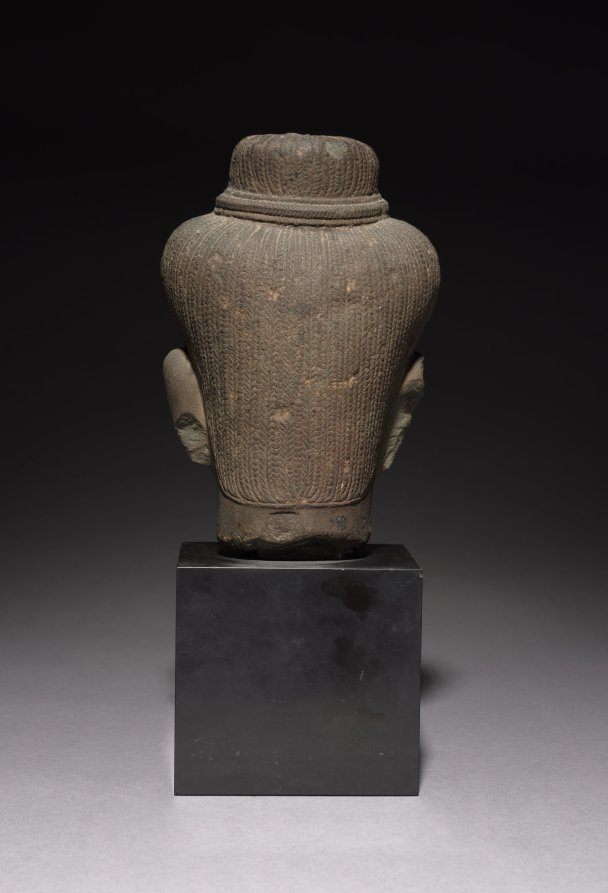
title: Head of a Follower of Shiva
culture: Cambodia, Angkor, 10th century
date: 900s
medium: sandstone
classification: Sculpture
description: Khmer patrons and artists produced works of art that could depict either a deified king or a god who has royal attributes. The Khmer cult of the god-king allowed for such fluidity of interpretation. Presence of a third eye in the forehead and matted locks of hair are attributes both of the Hindu god Shiva and the followers who emulated him in order to get closer to him.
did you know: The third eye on the forehead is a symbol of enlightenment.